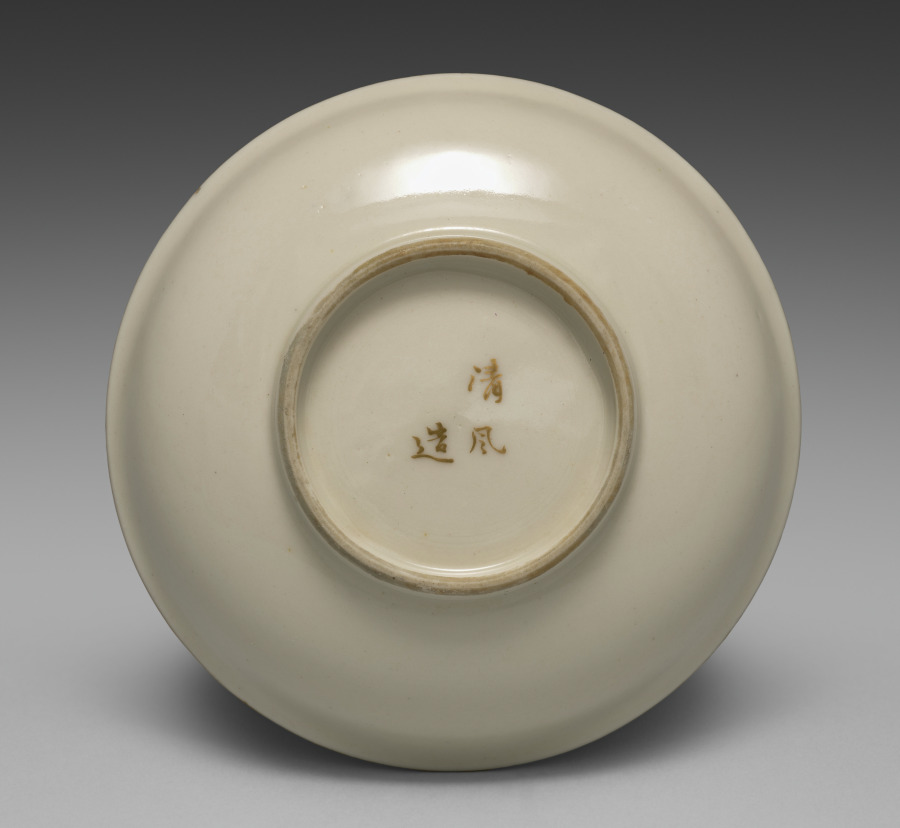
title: Small Dish from Dining Set with Plum Blossoms and Cracked-Ice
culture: Japan, Meiji period (1868–1912)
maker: Seifū Yohei II (Japanese, 1844–1878)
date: c. 1875–78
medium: Porcelain with molded designs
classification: Ceramic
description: Each item in this set has a delicate low-relief design of flowering plum branches over scattered, intersecting lines meant to resemble the cracked-ice surface of a frozen body of water and is signed on the base in gold pigment. While Yohei II produced many fine works in underglaze blue, like those produced by Kiyomizu Shichibei, he also made works in quite different styles later in his career, from the early 1870 s. In 1873, he was appointed purveyor to the Industrial Center of Kyoto Prefecture, a designation associated with Kyoto’s efforts to reach an international market through the port of Kobe; and from 1875 until his death, he was involved in national-level projects to present Japanese ceramics across the world. It was during this period that Yohei III was apprenticed to Yohei II, and it has been suggested that this set may in fact be an early example of Yohei III’s work, which he signed with his teacher’s name. Decorated with flowers resembling Japanese textile motifs, the set calls to mind the design of Yohei II’s pair of vases with plum blossoms in the Victoria and Albert Museum. Here, the elaborate trees created for a formal public exhibition setting have been translated into the approachable blossoms of the genteel domestic environment. While the designs are consistent across the pieces, each raised flower petal and pistil and each incised line in the ice was done by hand, so the cups, bowls, and dishes are similar yet unique. The bottoms of two boxes once identified the set’s owner, but the information has been deliberately obscured with black ink. However, inscriptions still visible appear to indicate two occasions, once at the end of July 1886 , and once again in June 1916 , when parts of the set were requested from Hokura in Niigata Prefecture. The location corresponds to a neighborhood in the present-day city of Jōetsu. The surname Tsuji 辻 also appears on a paper tag affixed to one of the box cloths. Future research may possibly reveal more about their provenance. A vase by Yohei III in a private collection combines the formal grandeur of the Yohei II vases in the Victoria and Albert Museum with the gentler design of this dining set, placing flowering plum trees against soft, scalloped-edge clouds resembling those in golden screens.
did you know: The dining wares have a creamy white coloration that the four boxes containing them identify as Korean in style.